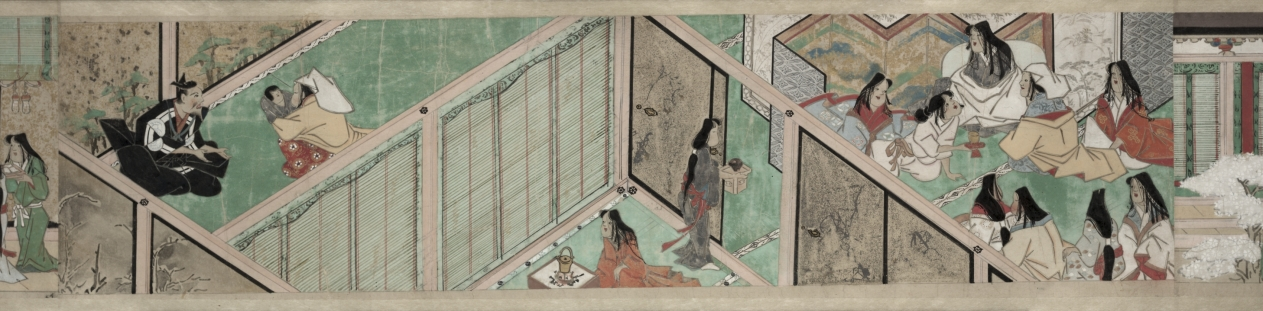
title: The Saltmaker's Story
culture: Japan, Edo period (1615–1868)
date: early 1600s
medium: One of a pair of handscrolls; ink, color, and gold on paper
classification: Painting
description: Once read and copied by girls at New Year’s celebrations and included in dowries, The Saltmaker’s Story is a rags-to-riches tale in which daughters are gifts from the gods. Despite his simple outlook, the main character progresses from humble roots as an associate at Kashima Shrine to the elite status of grandfather of the emperor through the intervention of the Kashima deity. The Saltmaker’s Story is traditionally presented in a set of three scrolls, but the text of this set has been removed by a previous owner, who remounted the illustrations as a pair. The paintings of this one take us from right to left through the first half of the tale.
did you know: This handscroll originally had texts before its paintings, but the texts were removed.